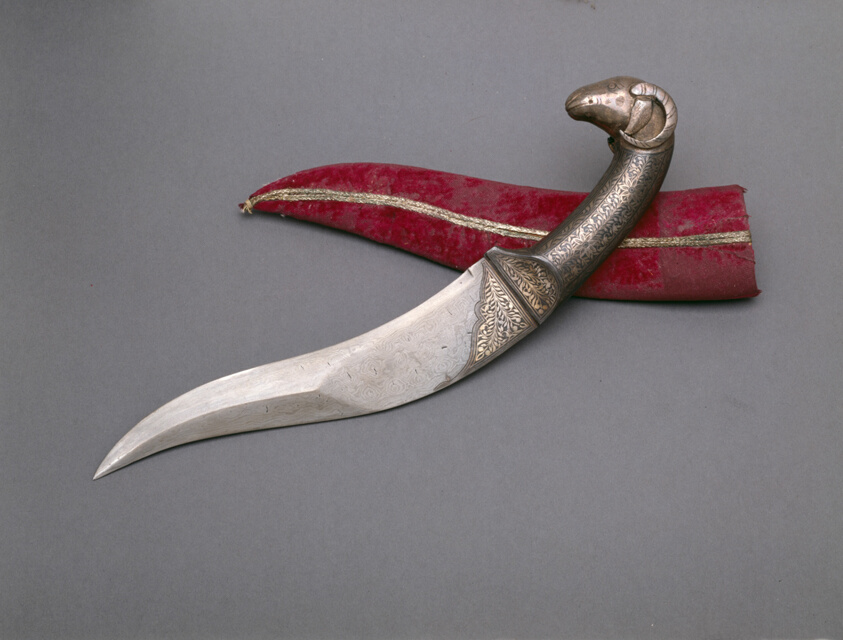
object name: Armor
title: Curved Dagger (Khanjar) with Ram-Head Pommel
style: South Asian, mughal, Indian (South Asian), asian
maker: India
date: 17th/18th century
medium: Watered steel inlaid with gold and silver in the kuftgari technique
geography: India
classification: steel; metal; weapon; asian art; knife weapons; armor